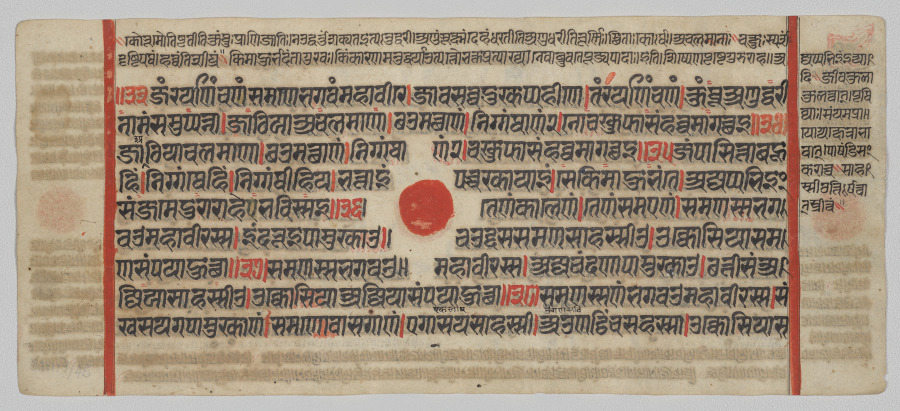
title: Text, Folio 42 (recto), from a Kalpa-sutra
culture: Western India, Gujarat, last quarter of the 15th century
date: c. 1475–1500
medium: Gum tempera, ink, and gold on paper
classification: Painting